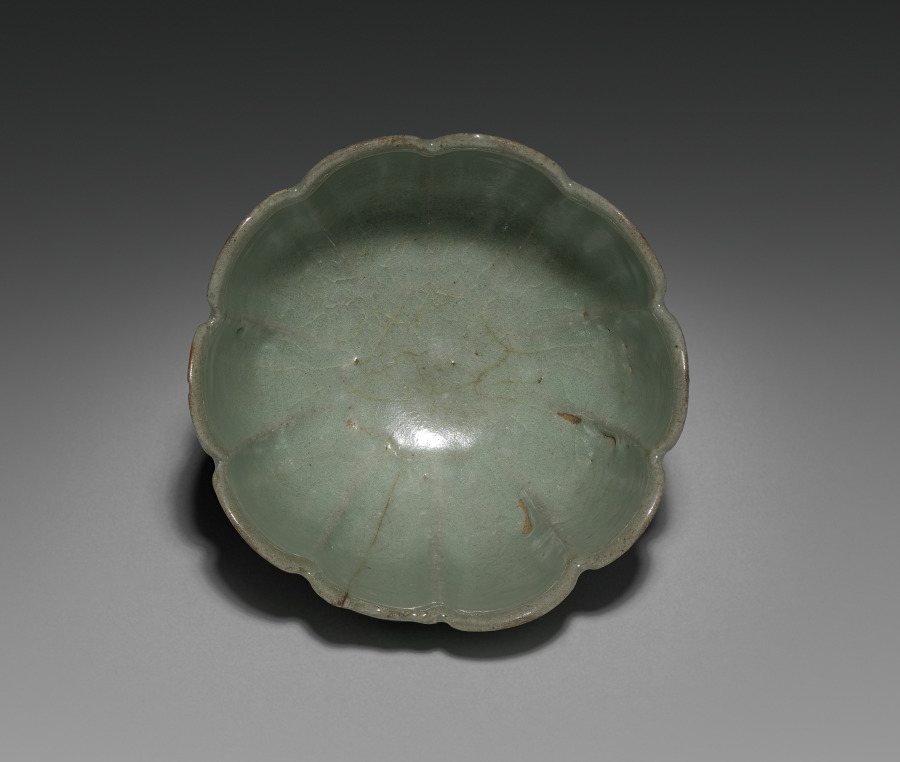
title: Cup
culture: Korea, Goryeo dynasty (918–1392)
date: 1100s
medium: Celadon ware with inlaid white and black slip decoration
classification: Ceramic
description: This celadon wine cup is inlaid with a chrysanthemum pattern that reflects Koreans’ enjoyment of both the poem "Drinking Wine" and the blessings of longevity associated with the Double Nine Festival. The flower design on the saucer is less delicate than the cup, as the cup and saucer were originally from different sets; they were later paired together after each lost its mate.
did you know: Elites of the Goryeo period are known for their love of drinking tea and wine. This type of delicate-looking cup stand not only made their drinking experience more enjoyable, but also showed their refined taste.